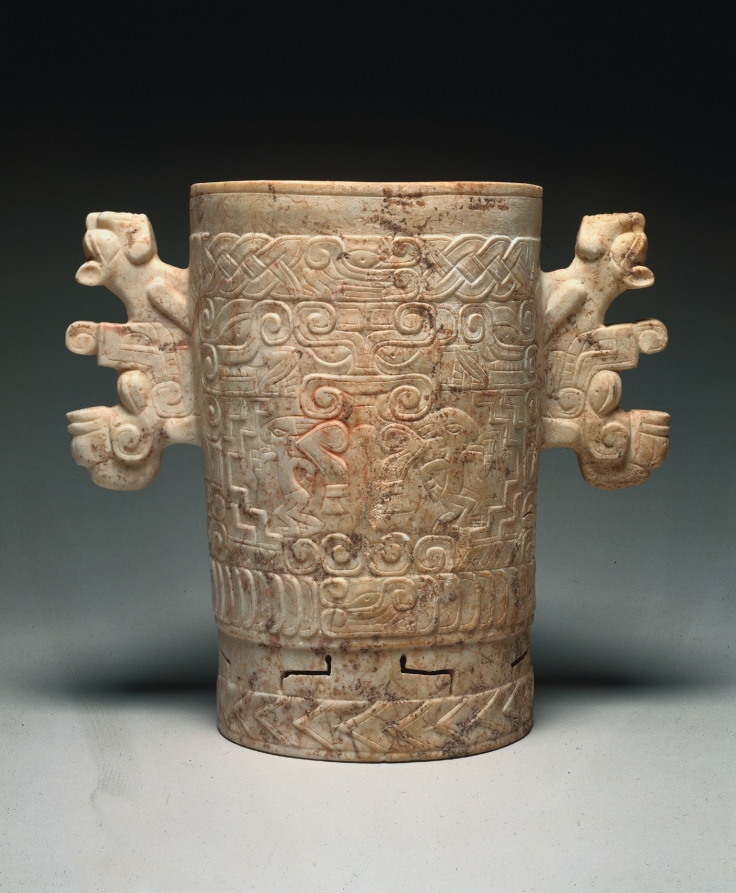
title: Carved Stone Vessel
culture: Northwest Honduras, Ulúa Valley, 8th-10th century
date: 700–1000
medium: marble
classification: Sculpture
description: This stone vessel, made by eastern neighbors of the Maya, is one of the finest and largest of its kind. On the exterior are several motifs that combine to create an unusually complex design that features a grotesque head, either in profile or front-facing, with a leg near its mouth. In the main panel a frontal version of the head hovers over two legs, the knees pointed sharply outward. Beside each leg is a lively human, rarely seen in such works. Little is known about the motifs’ meanings or the vessel’s use.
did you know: Carved in the round, the vessel's handles suggest a feline that emerges from a serpent-like head with an upturned snout.